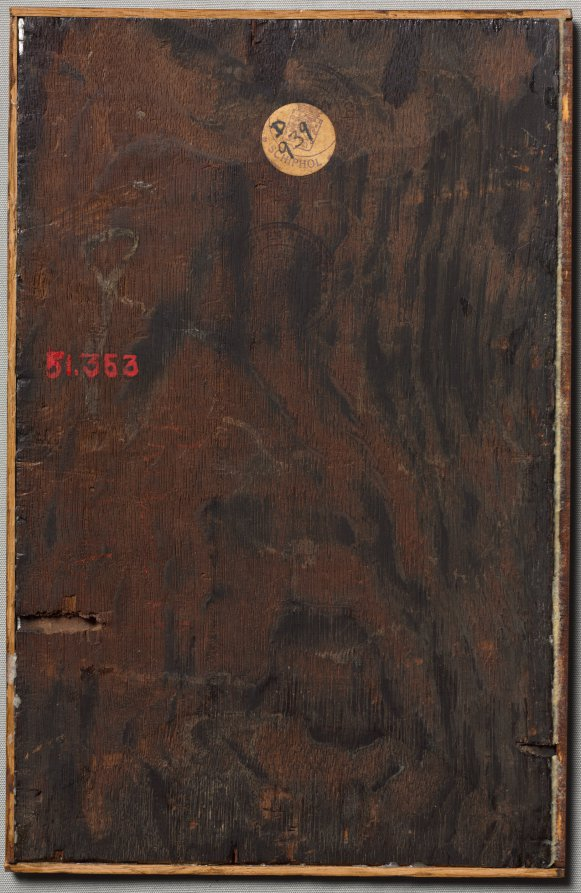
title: The Adoration of the Magi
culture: Netherlands, Haarlem, 15th century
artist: Geertgen tot Sint Jans (Netherlandish, c. 1460-c. 1490)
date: 1480s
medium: oil on wood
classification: Painting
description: Little is known about the life and career of Sint Jans. He seems to have been born in Haarlem in Holland in the northern Low Countries where he may have been attached to the Knights of Saint John as a lay brother, and likely produced an altarpiece for that order. (His name seems to derive from his affiliation with the Knights of Saint John.) He died young in his late 20s. Between 12 and 16 paintings are attributed to him. The subjects tend to derive from the New Testament. The original context of this painting is not known.